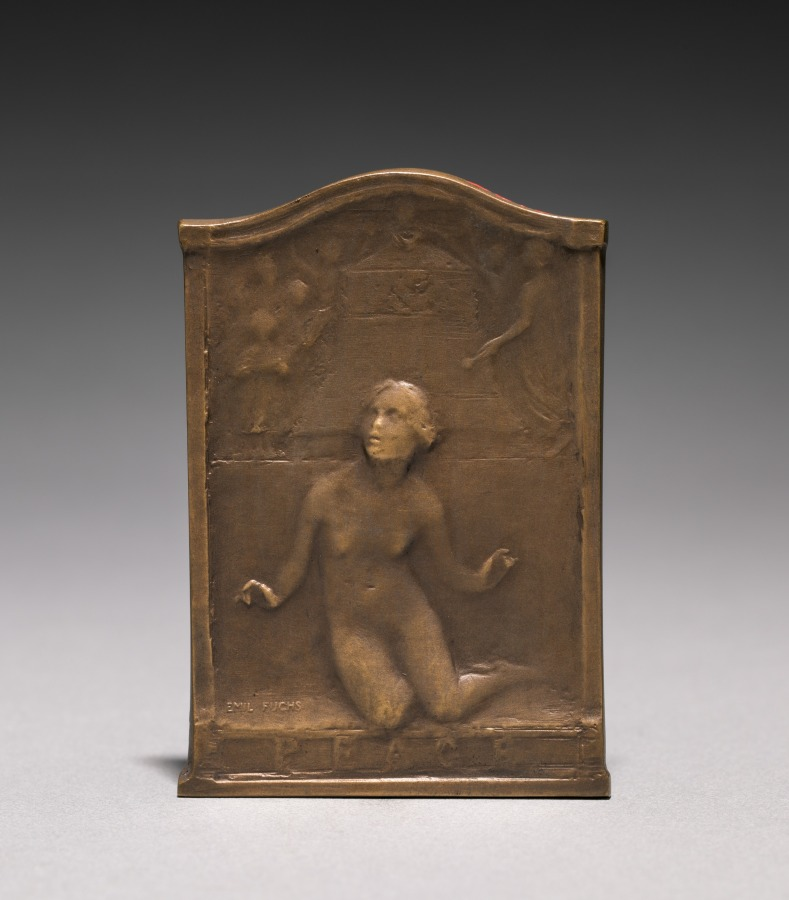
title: Plaquette: Peace and War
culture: America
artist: Emil Fuchs (American, born Austria, 1866–1929)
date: 1913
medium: bronze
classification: Metalwork